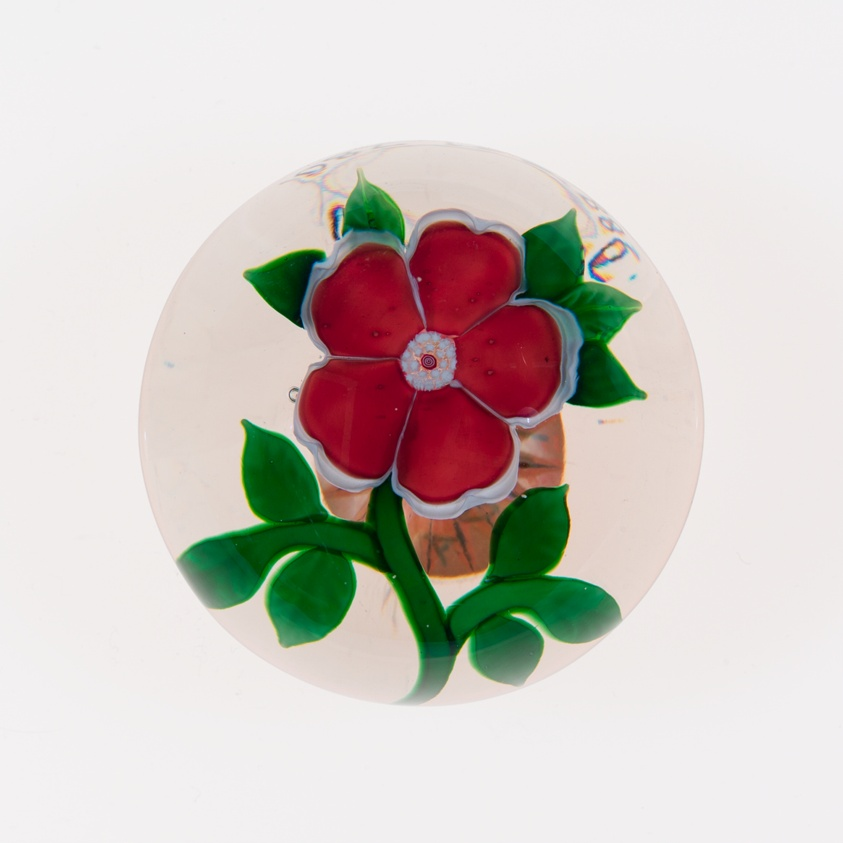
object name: Glass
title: Paperweight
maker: Baccarat Glassworks (Cristalleries de Baccarat); Lorraine, France, founded 1764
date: c. 1845–60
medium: Glass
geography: Baccarat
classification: paperweight; glass